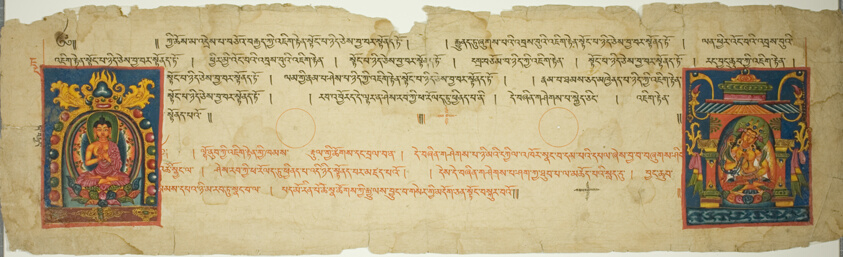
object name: Book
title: Page from a Buddhist Manuscript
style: Himalayan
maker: Western Tibet; Guge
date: 13th/14th century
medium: Ink, colors, and gold on paper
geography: Western Tibet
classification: pen and ink drawings; manuscript; asian art; book